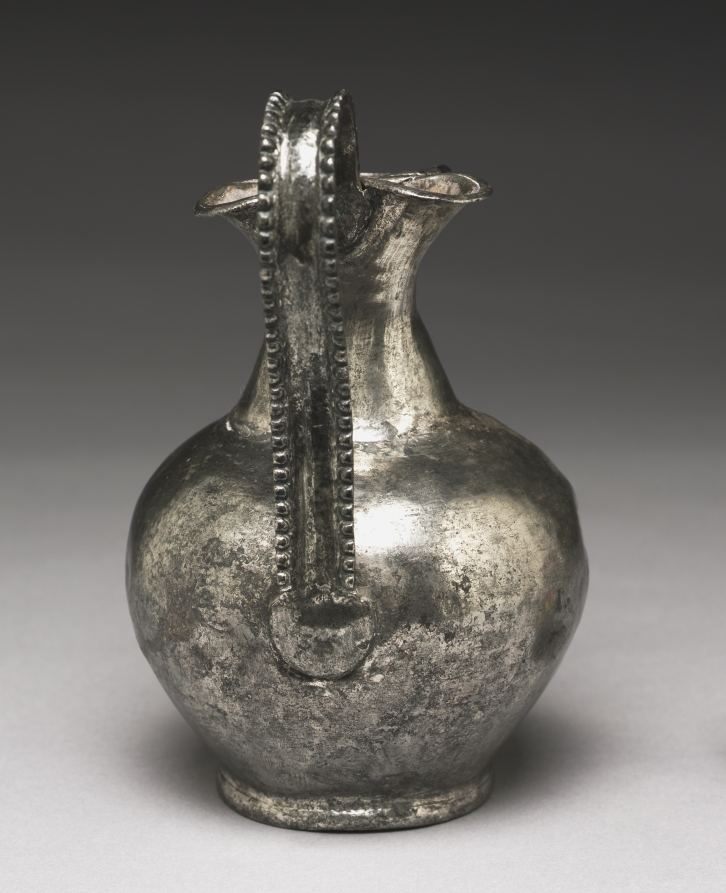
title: Ewer with a Trefoil (Three-Part) Spout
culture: Byzantium, Syria(?), Byzantine period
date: 300–600 CE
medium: silver with niello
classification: Metalwork